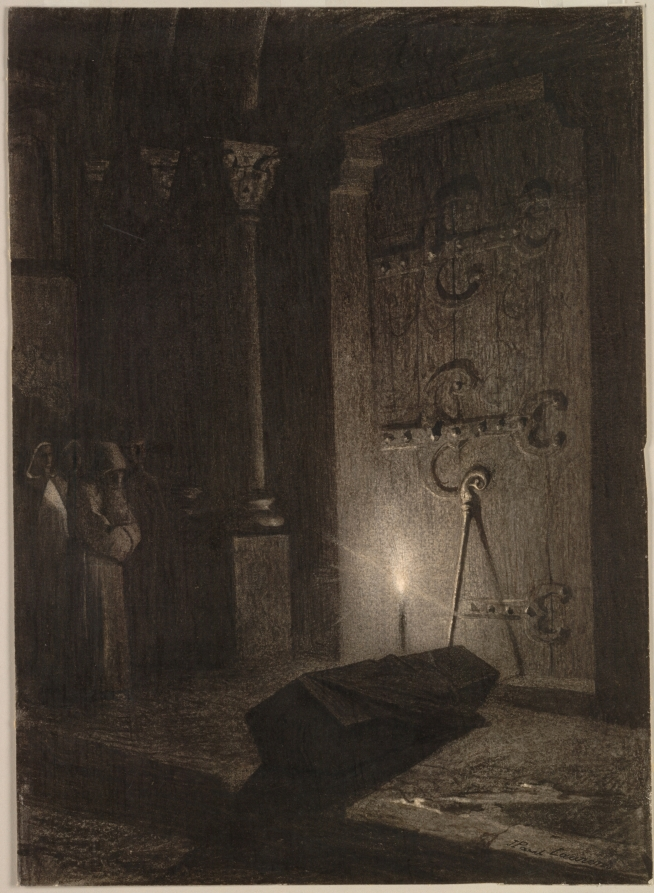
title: A Funeral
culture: France, 19th century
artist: Jean-Paul Laurens (French, 1838–1921)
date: c. mid-1870s-early 1880s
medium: charcoal and brush and black and brown ink, with stumping and scratching away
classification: Drawing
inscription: signed, lower right, in black ink: J Paul Laurens; formerly inscribed in graphite at lower right of mount: 132 (mount destroyed)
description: The macabre subject matter of A Funeral is typical of Jean-Paul Laurens, whose interest in depicting cadavers and coffins earned him the nickname "the painter of the dead." Laurens was also attracted to subjects from church history, and, here, the crosier leaning against the door behind the coffin indicates the deceased was a bishop. Highly finished drawings like this one are rare in Laurens's production. His technique of covering the surface with a variety of media and scratching away for highlights is quite similar to the one used by another artist in the exhibition-Alexandre Bida, in his Café at Constantinople [cat. no. 34]. Laurens utilized the technique effectively in this gloomy scene, where the glowing candle flame casts long shadows and feebly illuminates the columns receding into darkness on the left.